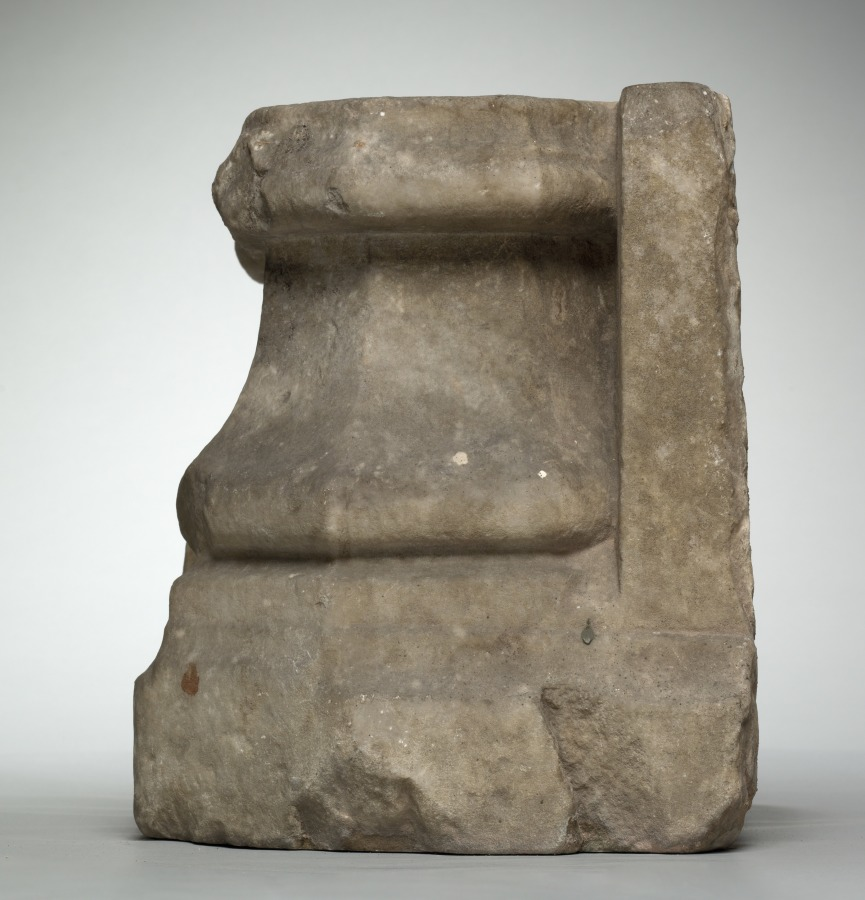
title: Double Column Base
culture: France, late 15th century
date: late 1400s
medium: marble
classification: Sculpture